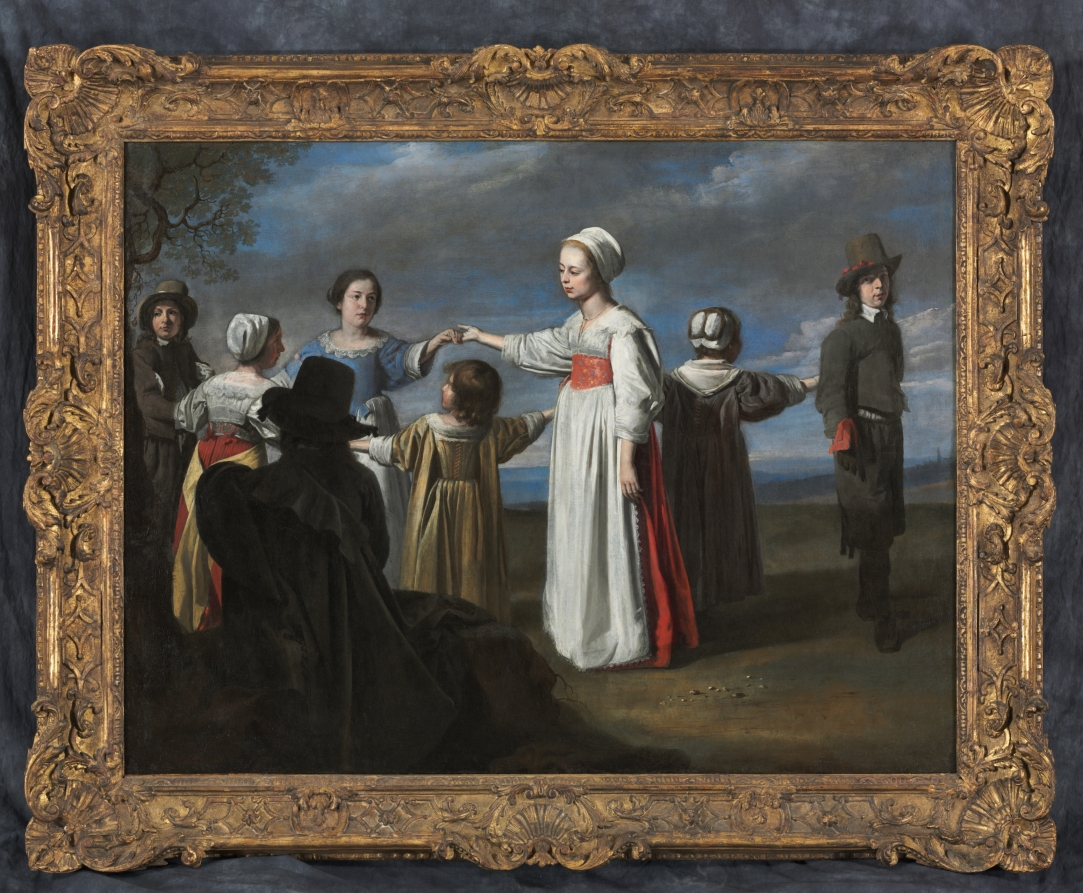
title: Children Dancing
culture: France, 17th century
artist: circle of Le Nain (French)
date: c. 1650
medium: oil on canvas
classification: Painting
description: Antoine, Louis, and Mathieu Le Nain were brothers who ran a collective studio in Paris from around 1630 until 1648, when Antoine and Louis died. Mathieu continued to produce work under their name "Le Nain" throughout the 1650s. Of the museum's four paintings that have been called "Le Nain" (1958.174, 1958.175.1, 1958.175.2), this work has held its attribution to Mathieu the longest. With his back to the viewer, a musician sits in shadow while a group of children pose patiently in a chain-like formation, awaiting the start of their dance. Because of its reliance on order and collaboration, dancing symbolized familial harmony. The attention to the individuality of the children suggest a family portrait, while their wistful expressions and melancholic tone have led to the hypothesis that the children are portraits-both living and posthumous. The description of the intricate lace and the wearied expressions of the slim boys is characteristic of Mathieu's handling. However, the canvas has been attributed to one of Mathieu's followers, the Master of the Games, because of the static, brightly lit figures whose elongated shadows don't quite describe their forms.